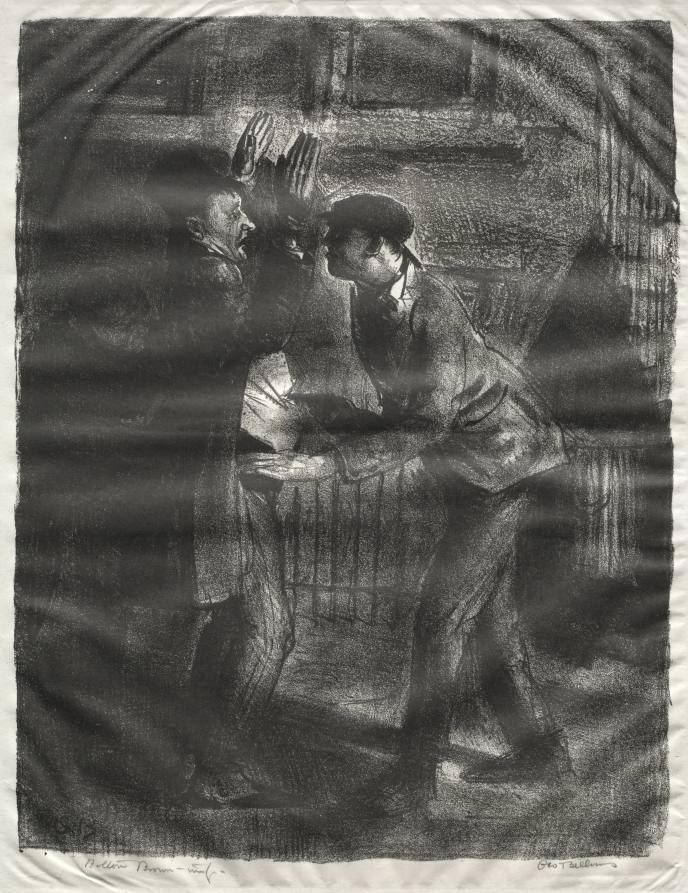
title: The Holdup, second state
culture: America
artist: George Bellows (American, 1882–1925)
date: 1921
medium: lithograph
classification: Print